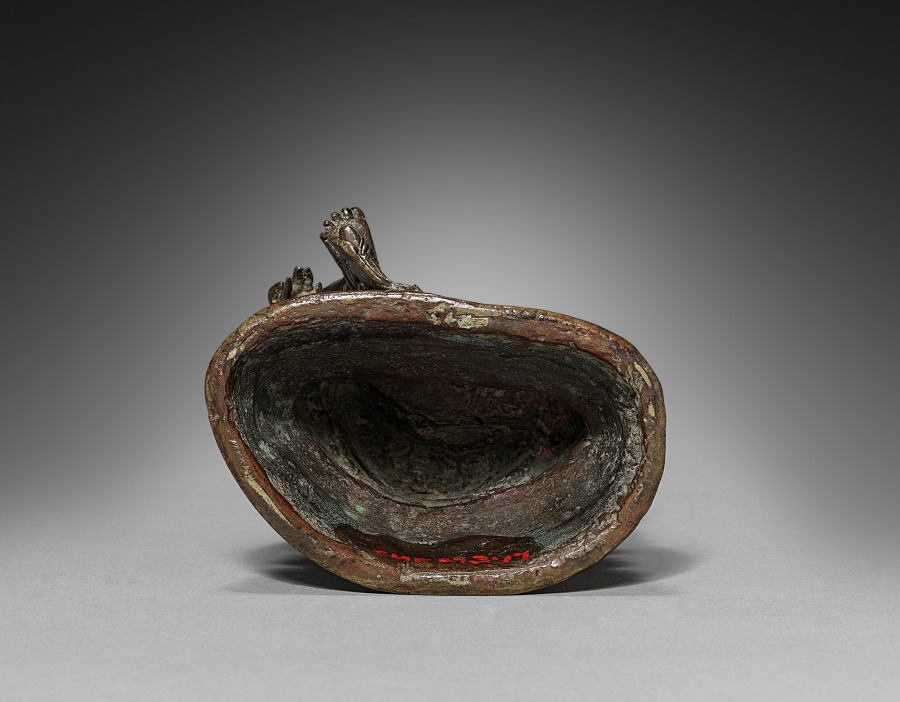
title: Seated Tara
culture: India, Bengal, late Pala dynasty, 12th Century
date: 1100s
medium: bronze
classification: Sculpture